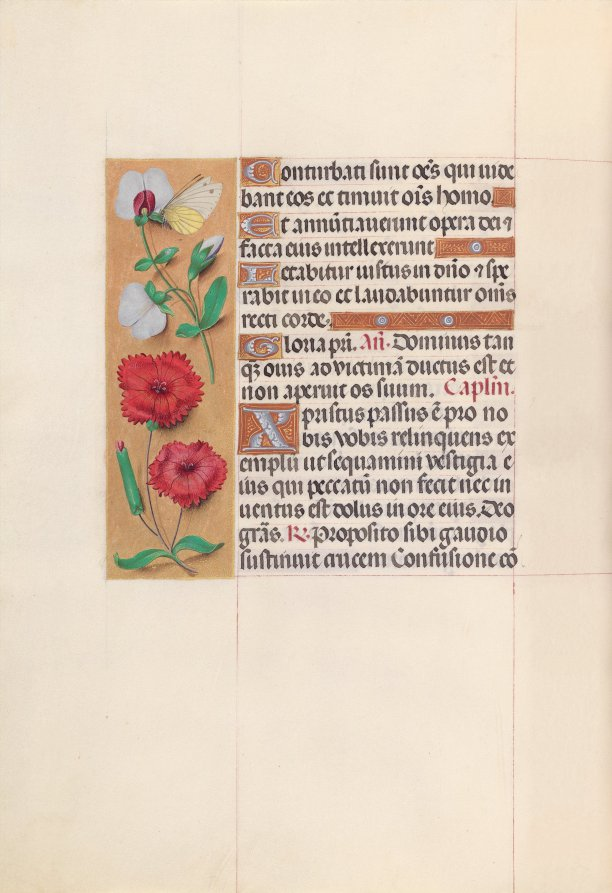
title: Hours of Queen Isabella the Catholic, Queen of Spain: Fol. 64v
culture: Flanders, Ghent and Bruges, late 15th century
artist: Master of the First Prayerbook of Maximillian (Flemish, c. 1444–1519)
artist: and Associates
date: c. 1500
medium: ink, tempera, and gold on vellum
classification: Bound Volume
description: This manuscript was illuminated by a circle of at least five highly organized manuscript painters active in the Flemish cities of Ghent and Bruges. The principal illuminator was Alexander Bening, who painted the majority of the book's miniatures. Manuscripts produced by this circle of artists are renowned for the decoration of their borders, which typically feature a rich variety of realistically-painted flowers, birds, and butterflies. This prayer book, called a book of hours, was intended not for a cleric, but for the private devotions of a lay person-in this case, Isabella the Catholic, Queen of Spain (1451-1504). Isabella's coat of arms embellishes the book's frontispiece. It is unlikely that the book was commissioned by the Queen herself; rather, she probably received it as a diplomatic gift from someone courting her patronage, perhaps Cardinal Francisco Jimenez de Cisneros. A Franciscan friar, Jimenez was dependent upon Isabella for his advancement, first to the post of Queen's confessor in 1492, and then to Archbishop of Toledo in 1495.